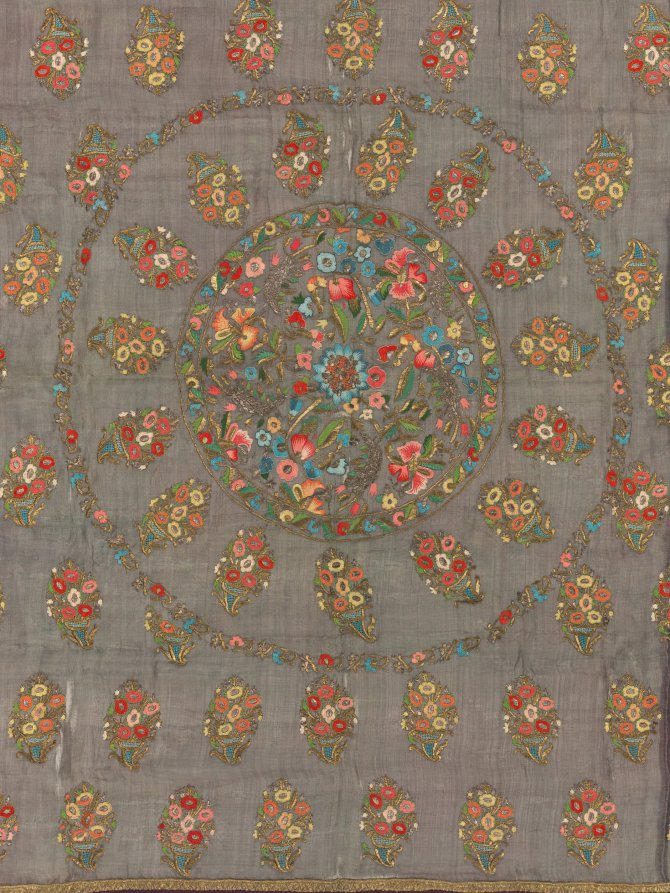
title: Turban cover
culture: Turkey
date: 1700s-early 1800s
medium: plain weave: silk; embroidery, double-running stitch: silk, gilt- and silver-metal thread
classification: Embroidery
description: This exceptionally fine, diaphanous silk turban cover represents the highest quality professional embroidery. Shiny gilt- and silver-metal thread and at least ten colors of silk thread—including newly fashionable pastel tones—create three-dimensional blossoms in the central roundel and multicolored cornucopias on the lavender silk ground. In Turkey, square cloths embroidered with one or two concentric circles in the center of floral fields were generally used to cover stored turbans, a function well served by this elegant cover with weighted golden borders.